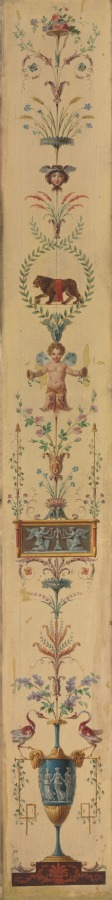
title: Decorative Panel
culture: France, 18th century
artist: Pierre Rousseau (French, 1751–1829)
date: 1790s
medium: oil on canvas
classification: Painting